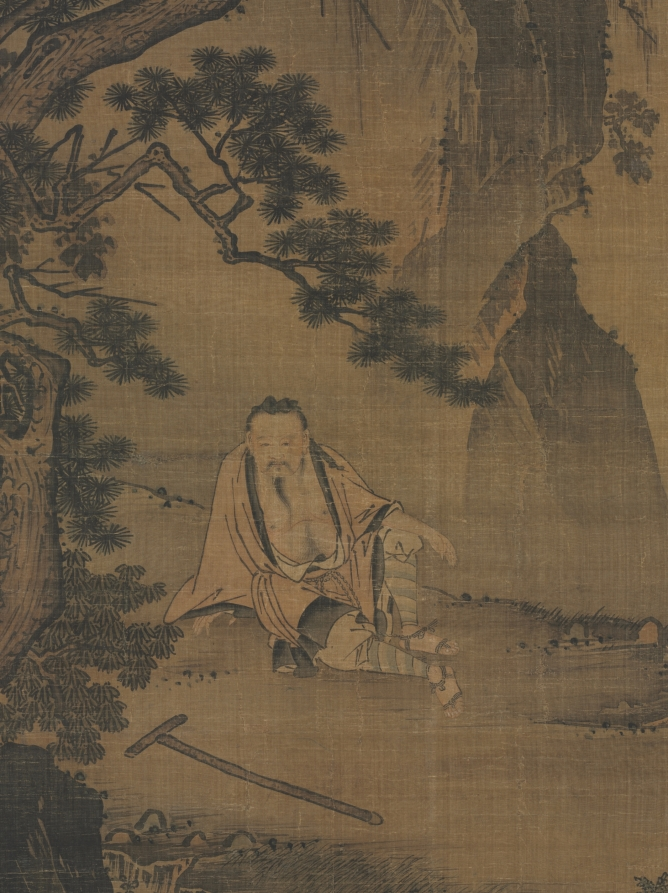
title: The Hermit Xu You Resting by a Stream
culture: China, Ming dynasty (1368–1644)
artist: Dai Jin (Chinese, 1388–1462)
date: 1400s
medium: Hanging scroll; ink and slight color on silk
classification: Painting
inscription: 5 seals: 1 of Huang Lin 黄琳 (active about 1496–1532); 4 unidentified.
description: Xu You, a recluse who refused the throne offered to him by legendary Emperor Yao, chose instead to farm on Mount Ji. Sitting under cliffs, his left arm resting on his risen leg and his loose robe revealing his belly, he displays a nonchalant attitude. Xu You is wearing a laborer’s outfit, a short robe and tight leggings, while his composed pose and gentle features reveal his lofty character. The composition shows rising mountains on the left juxtaposed by open space on the far right. Powerful brushstrokes and nuanced ink washes follow the style of the Southern Song (1127–1279) academy painters.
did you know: When the emperor offered him a post overseeing the Nine Territories (as China was known in ancient times), Xu You went to the River Ying to cleanse his ears from such an unwelcome proposition.